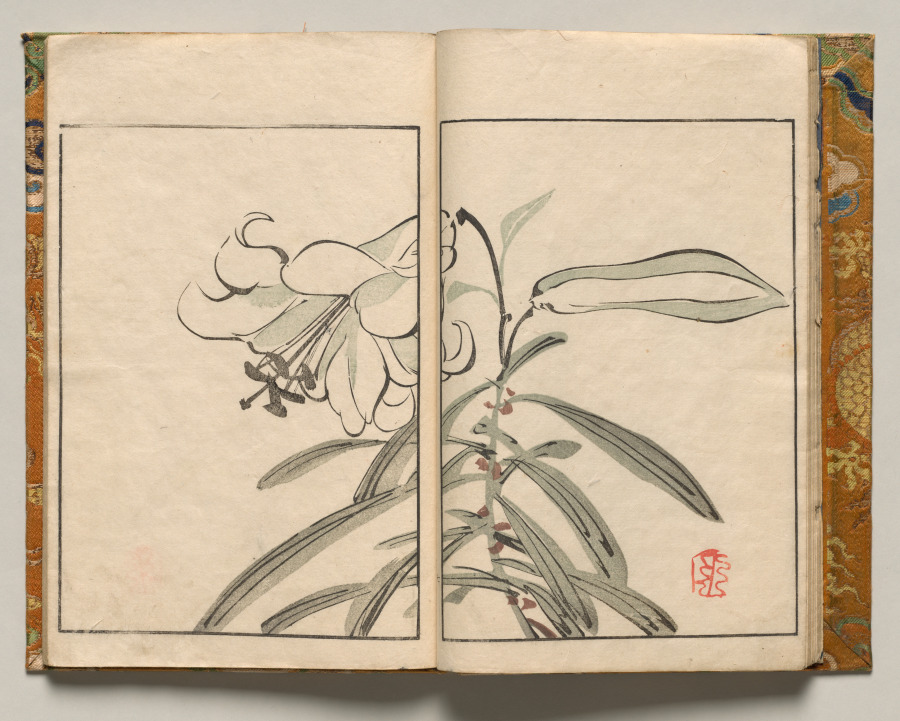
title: Lily, Design Seven from Shazanrō Picture Book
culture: Japan, Edo period (1615–1868)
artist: Tani Bunchō (Japanese, 1763–1841)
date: 1816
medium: woodblock-printed book; ink and color on paper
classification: Bound Volume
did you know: Shazanrō was one of Tani Bunchō's style names.